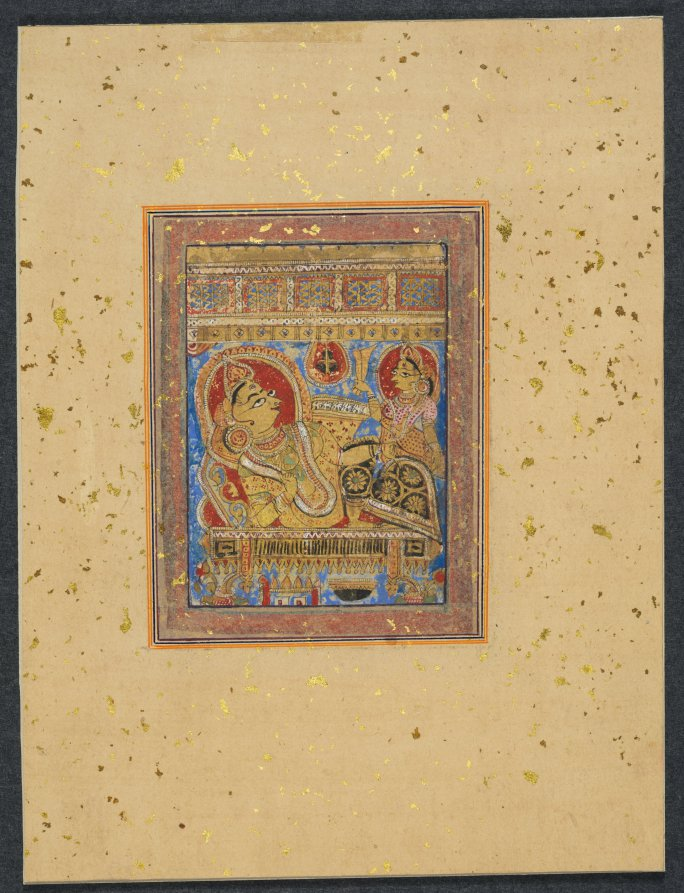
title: Painting from a Kalpa-sutra: Queen Trishala Reclining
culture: Western India, Gujarat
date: c. 1450–75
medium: Gum tempera and gold on paper; 18th century gold flecked border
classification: Painting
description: Until recently, and especially during the 1800s and early 1900s, the paintings in South Asian manuscripts were excised and mounted as individual works of art. These two paintings from a Jain manuscript of the Kalpa-sutra have been separated from the text and mounted with gold-flecked borders, like pictures in an album.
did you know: Queen Trishala is enjoying a happy pregnancy with the Jina-to-be.